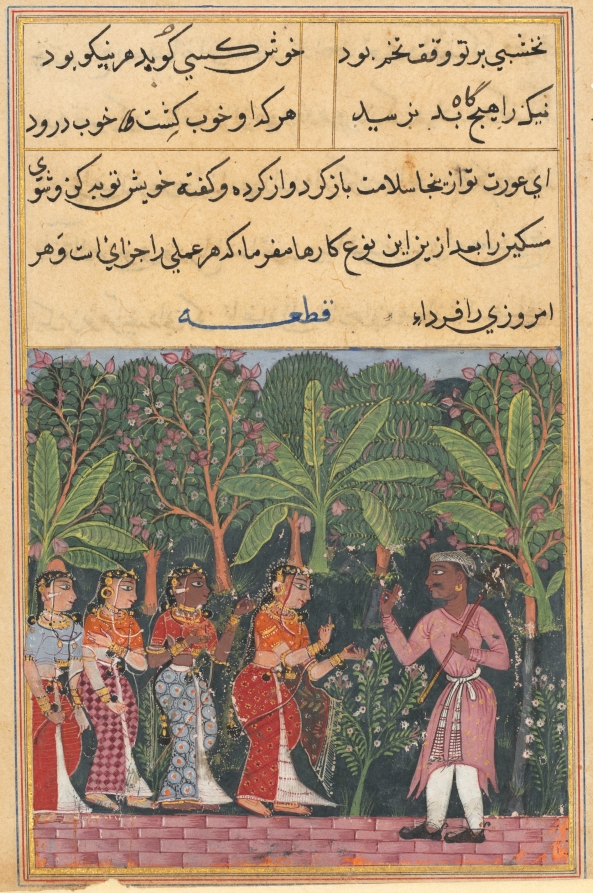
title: The merchant’s daughter meets the gardener, from a Tuti-nama (Tales of a Parrot): Twelfth Night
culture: Mughal India, court of Akbar (reigned 1556–1605)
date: c. 1560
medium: gum tempera, ink, and gold on paper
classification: Painting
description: Persian books are read from right to left. One artist illustrated the three scenes from one of the 52 stories of the Tuti-nama, retaining many pre-Mughal traits. Trees stand out as bold shapes, and figures are arranged in a single register, or horizontal spatial band, and have angular and expressive gestures. The figures of the women are closely related to pre-Mughal types, shown always in profile and wearing garments that stand stiffly and sharply out before them. In leaves from the Tuti-nama, Mughal artists adapted the colors, compositions, and figure types of the earlier style.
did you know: In the time since their first meeting, the gardener has become an ascetic.